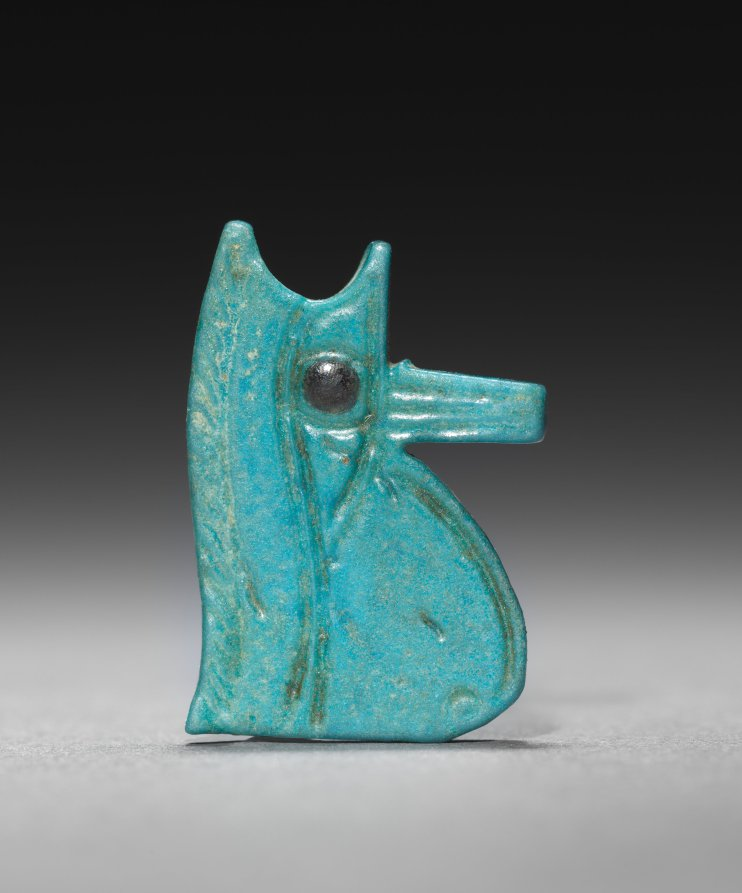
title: Eye of Horus Amulet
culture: Egypt, Third Intermediate (1069–715 BCE), Dynasties 22–25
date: 945–715 BCE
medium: turquoise faience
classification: Amulets